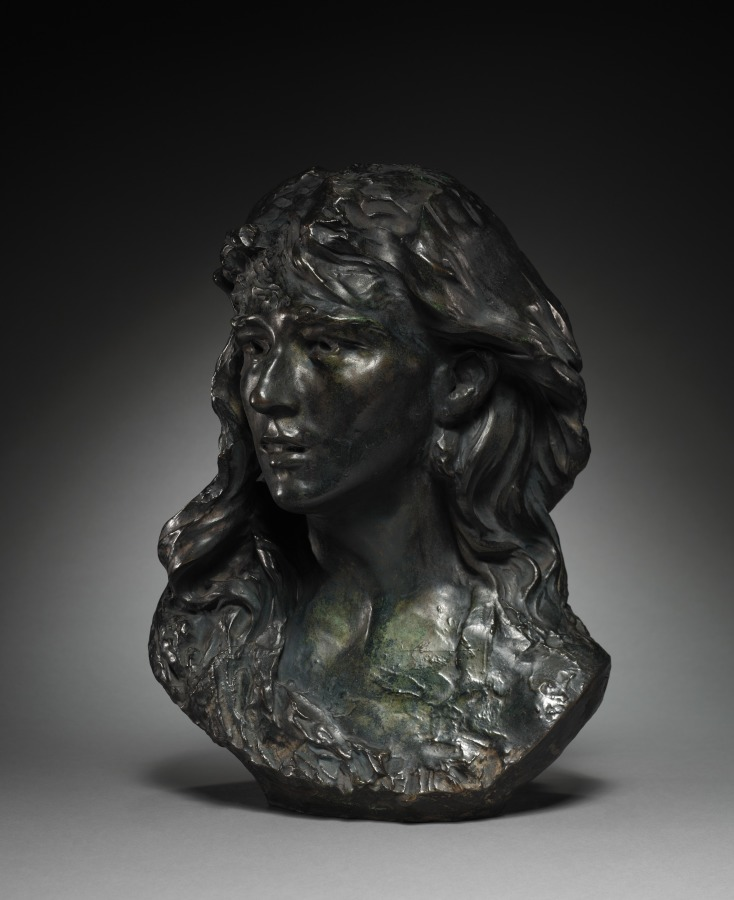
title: Mignon: Bust of Rose Beuret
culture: France, late 19th-early 20th century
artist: Auguste Rodin (French, 1840–1917)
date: c. 1867–1868 (original model)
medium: bronze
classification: Sculpture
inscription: Signed on shoulder to right: "A. Rodin"